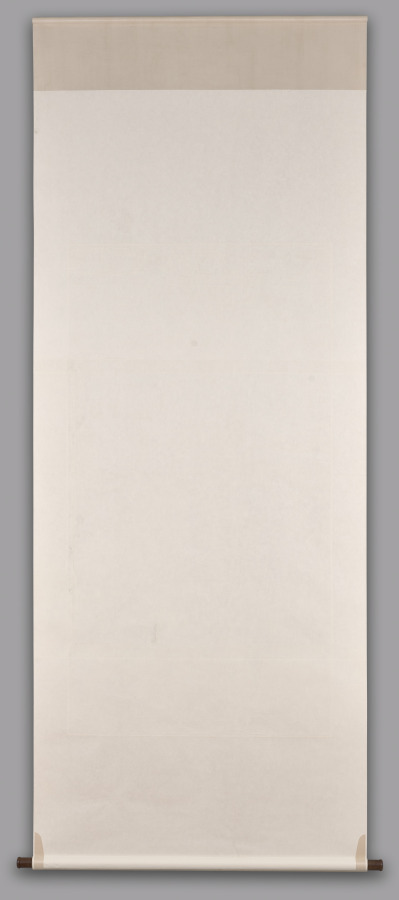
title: Bamboo in Snow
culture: China, Qing dynasty (1644–1911)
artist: Hong Fan (Chinese, active late 1700s–early 1800s)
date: 1818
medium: hanging scroll; ink on paper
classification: Painting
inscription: 戊寅夏至石農洪範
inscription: 洪範之印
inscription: 石農詩畫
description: Hong Fan’s bamboo stalks amidst rocky boulders bend gently forward. Light washes of ink suggest a misty, wintry atmosphere. Fan was inspired in style and concept by the poet, calligrapher and painter, Su Shi (1037-1101) who considered bamboo an ideal subject to express the calligraphic qualities of brushwork. Bamboo that bends, but does not break under the heavy snow, was also an image for the upright scholar who withstands adverse times.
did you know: Hong Fan’s bamboo stalks and rocky boulders fill the picture plane almost entirely and recede and fade in the background, suggesting the depth of a grove and a wintry, hazy atmosphere.